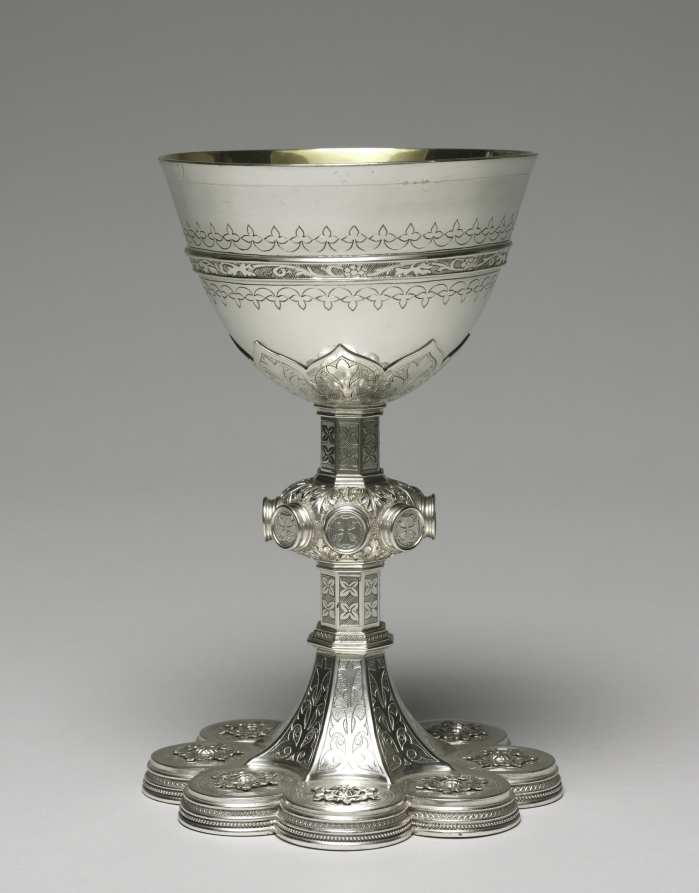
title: Chalice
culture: England, 19th century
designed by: Augustus Welby Northmore Pugin (British, 1812–1852)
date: 1849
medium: silver, cup interior gilded, with applied and chased decoration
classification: Silver